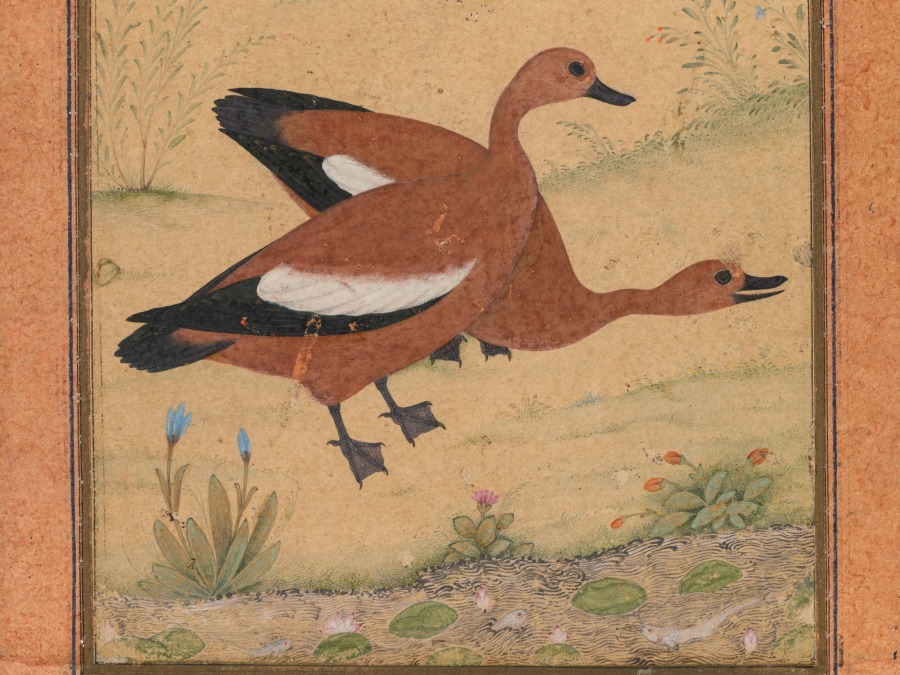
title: A pair of Brahminy ducks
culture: India, Mughal, 16th century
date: c. 1595; borders added probably 1800s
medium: Gum tempera on paper, mounted with later pink and blue borders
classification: Painting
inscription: Inscription above painting, Arabic numerals: 38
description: The Brahminy duck, also known as the ruddy shelduck, can be found throughout Southern Europe, North Africa, and Southeast Asia. This painting accurately depicts the orange coloring of Brahminy ducks and the patches of white on their wings. They are also recognizable by their long legs and short bills. The level of detail in realistic paintings of animals like this one suggests that Mughal artists studied live subjects, such as the waterfowl that lived in Mughal palace gardens.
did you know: Delicate dots articulate the texture of webbed feet and toothy row in the beak.